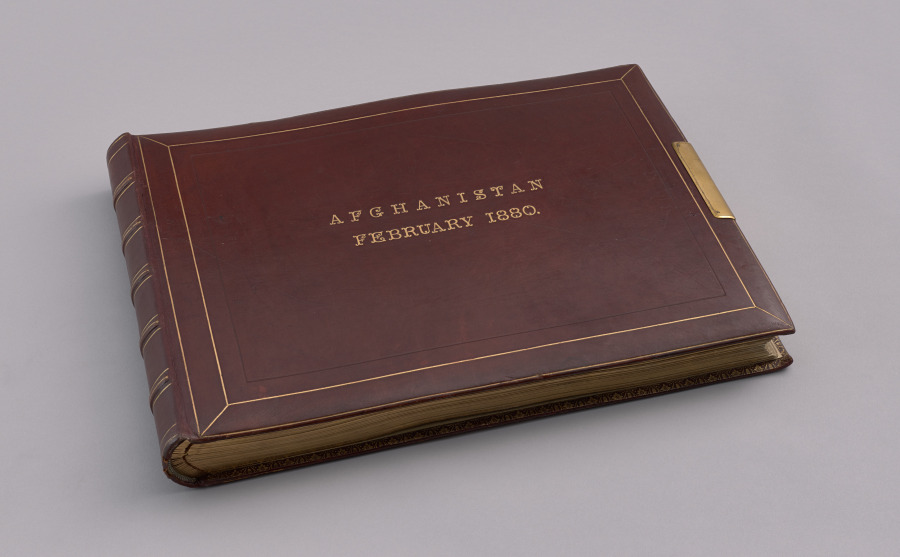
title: Afghanistan, February 1880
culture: Ireland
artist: John Burke (Irish, 1845–1915)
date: 1878–80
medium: album of 55 albumen prints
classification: Bound Volume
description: The subject of this album is the Second Anglo-Afghan War, which was fought from 1878 to 1880. John Burke was the first photographer to photograph extensively in Afghanistan and the main photographer covering that conflict. The technology of the day did not permit action shots of battles. As is usual for early conflict photography, the pictures are landscapes of the sites of momentous incidents, views of camps and civil and military infrastructure, and portraits of the soldiers and their leaders.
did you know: This album includes some of the earliest photographs of Afghanistan.